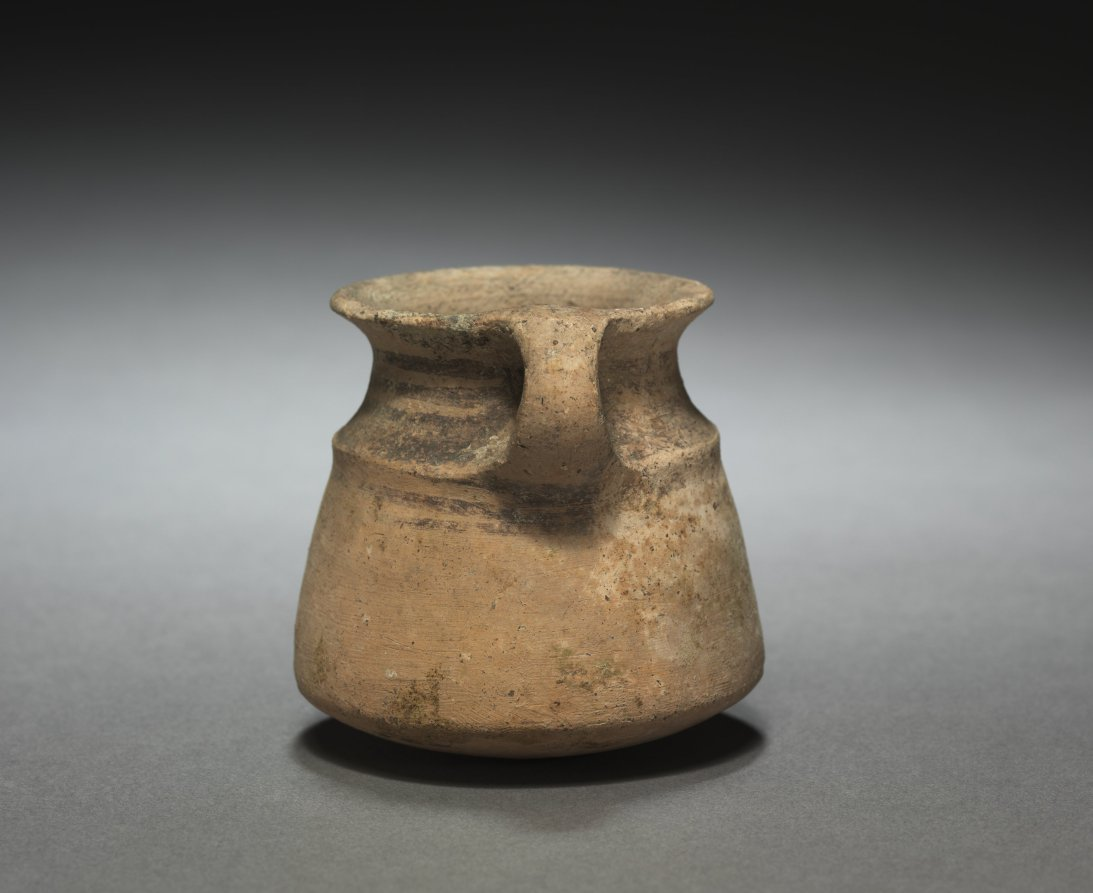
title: Pot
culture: Iran, Luristan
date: 3000–2000 BCE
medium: earthenware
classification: Ceramic